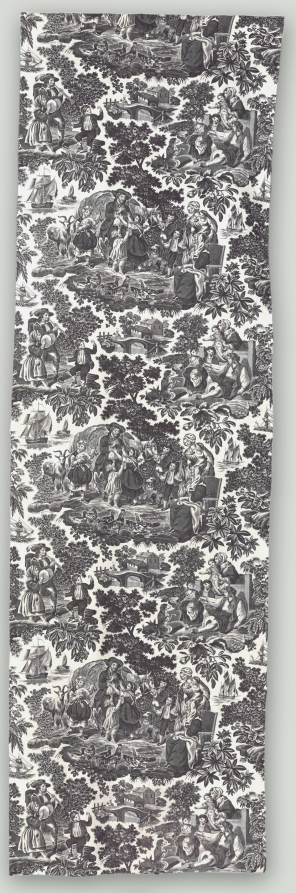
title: Miller's Family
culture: France, Rouen, early 19th century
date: early 1800s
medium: copperplate printed cotton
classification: Textile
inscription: "F Que D'A Henry a Rouen. Des et Gra de Buquet."